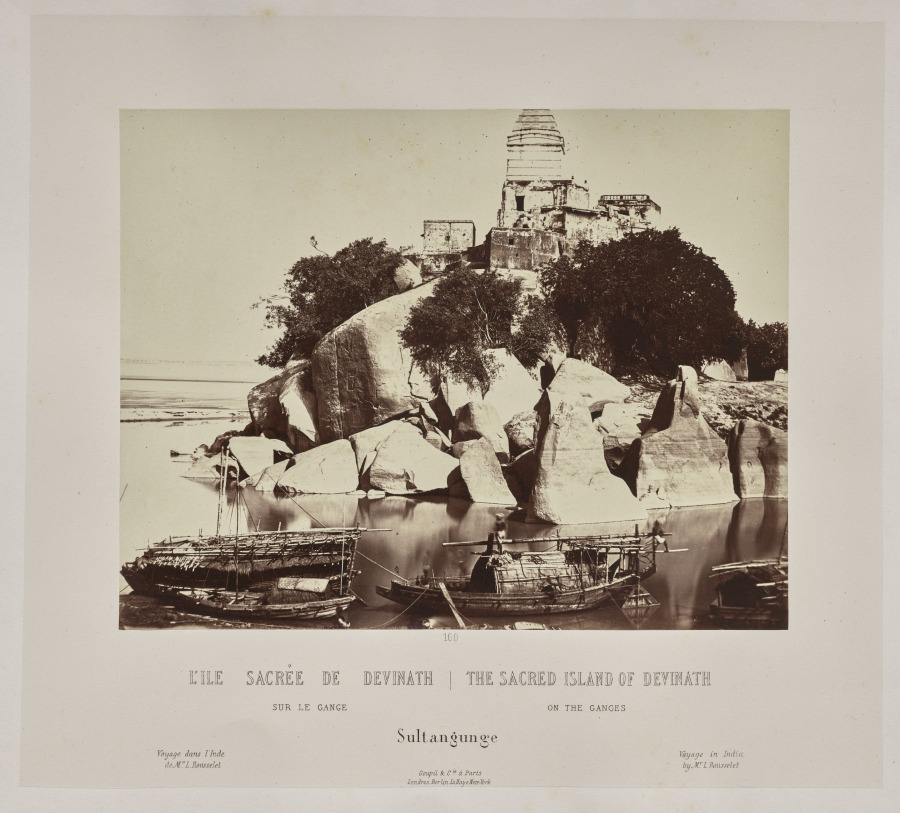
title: The Sacred Island of Devinath on the Ganges, Sultangunge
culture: France, 19th century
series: India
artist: Louis-Théophile Marie Rousselet (French, 1845–1929)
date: 1865–68, published 1869–70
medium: Albumen print from glass plate negative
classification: Photograph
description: Concerned that his drawings did not do justice to the splendor of India’s monuments, Rousselet learned photography in India that year, a remarkable accomplishment. He proved to be a talented photographer with a sophisticated sense of composition. The scenes in this volume sweep across sites of Sultanate, Rajput, and Mughal power in northern India, from the sacred Hindu city of Varanasi on the Ganges River to Alwar in Rajasthan. Also included are several scenes of industry and portraits of Indian rulers.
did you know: Louis Rousselet described himself as a “scientific traveler” when he went to India alone at age 18 in 1863 and stayed into 1868.